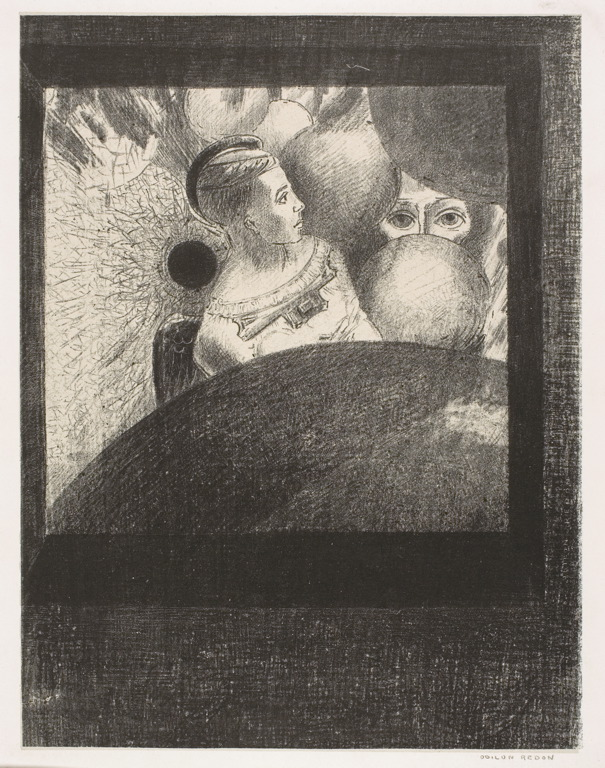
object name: Print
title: In the Spheres (The breath which leads living creatures is also in the SPHERES), plate 5 of 6 from To Edgar Poe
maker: Odilon Redon (French, 1840-1916)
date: 1882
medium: Lithograph in black on ivory China paper laid down on white wove paper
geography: France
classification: lithograph; print; prints and drawing; paper